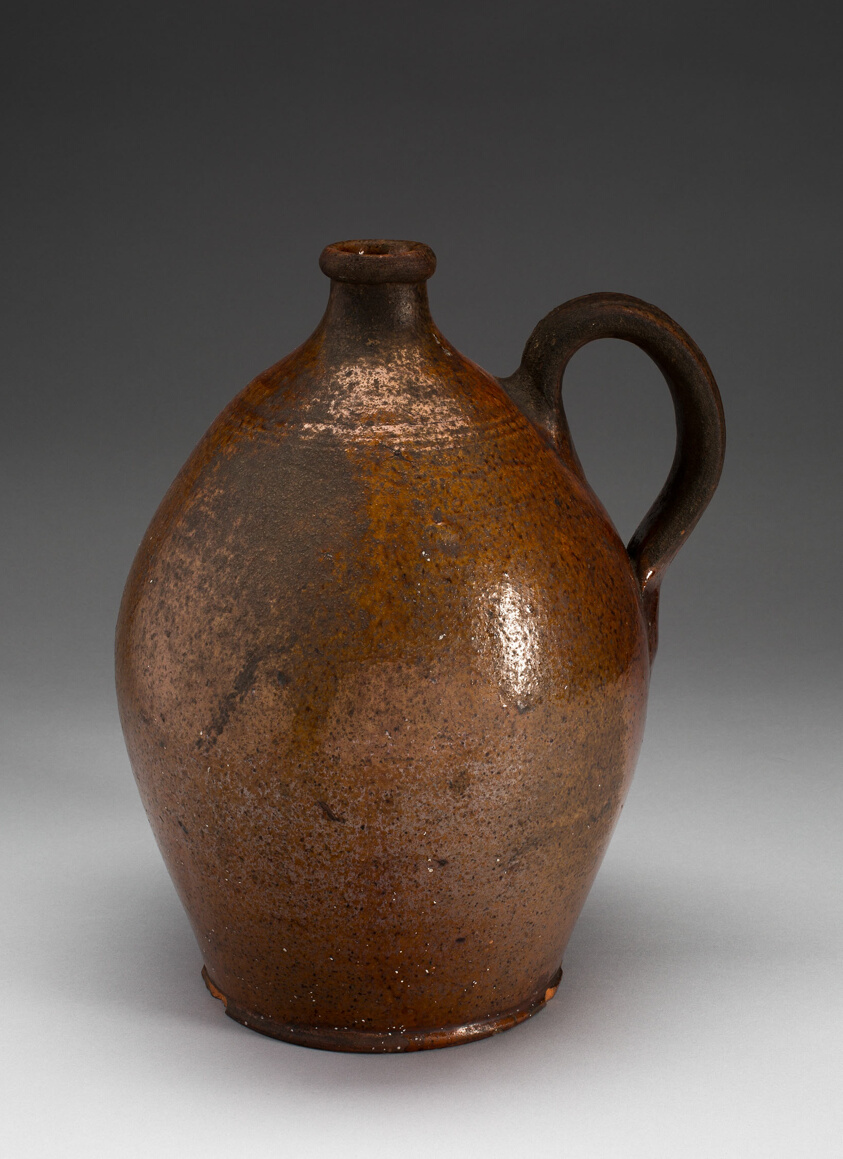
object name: Decorative Arts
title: Jug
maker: Artist unknown (American, 18th–19th century); Probably New England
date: 1790–1820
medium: Earthenware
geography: New England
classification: vessel; american decorative arts; american arts; ceramics; decorative arts